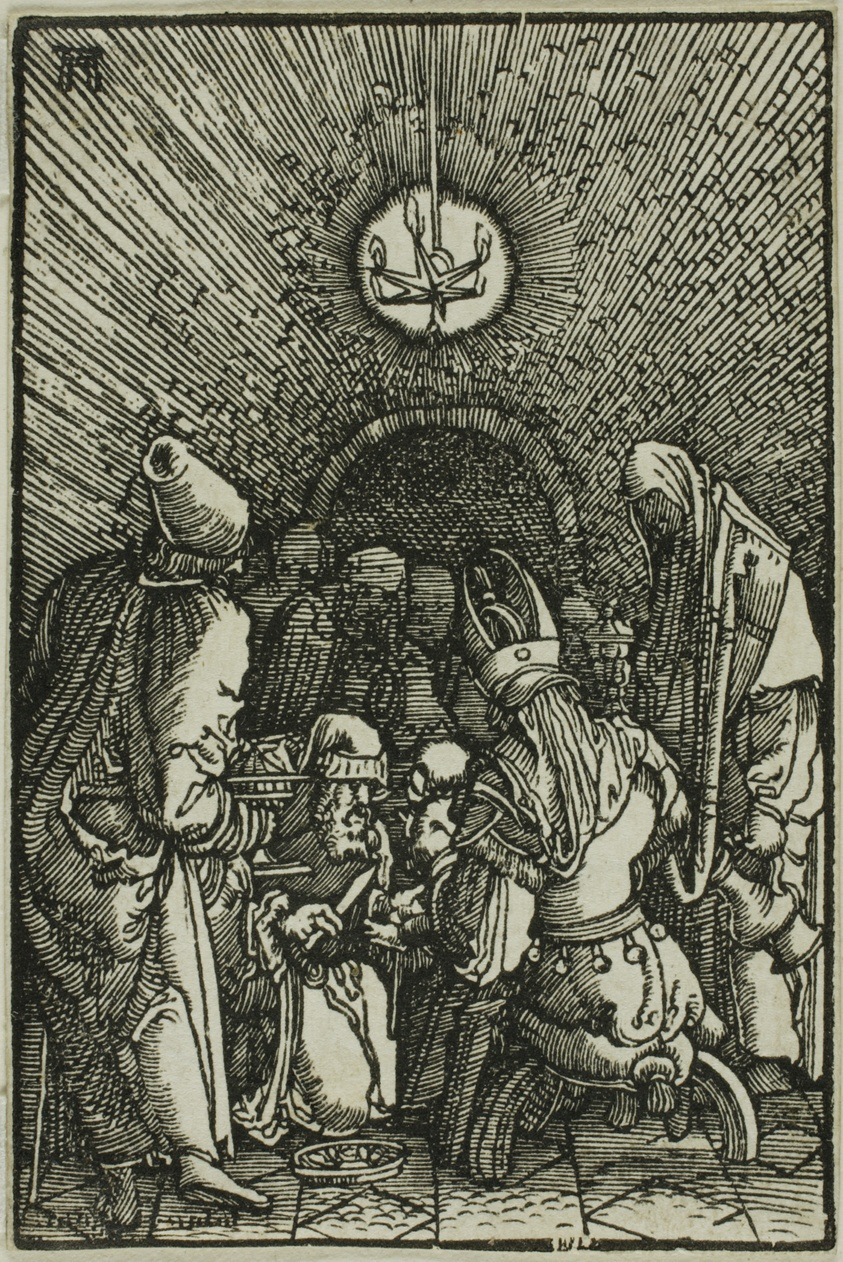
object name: Print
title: The Circumcision, from The Fall and Redemption of Man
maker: Albrecht Altdorfer (German, c.1480-1538)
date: 1513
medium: Woodcut in black on ivory laid paper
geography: Germany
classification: wood engraving; print; prints and drawing